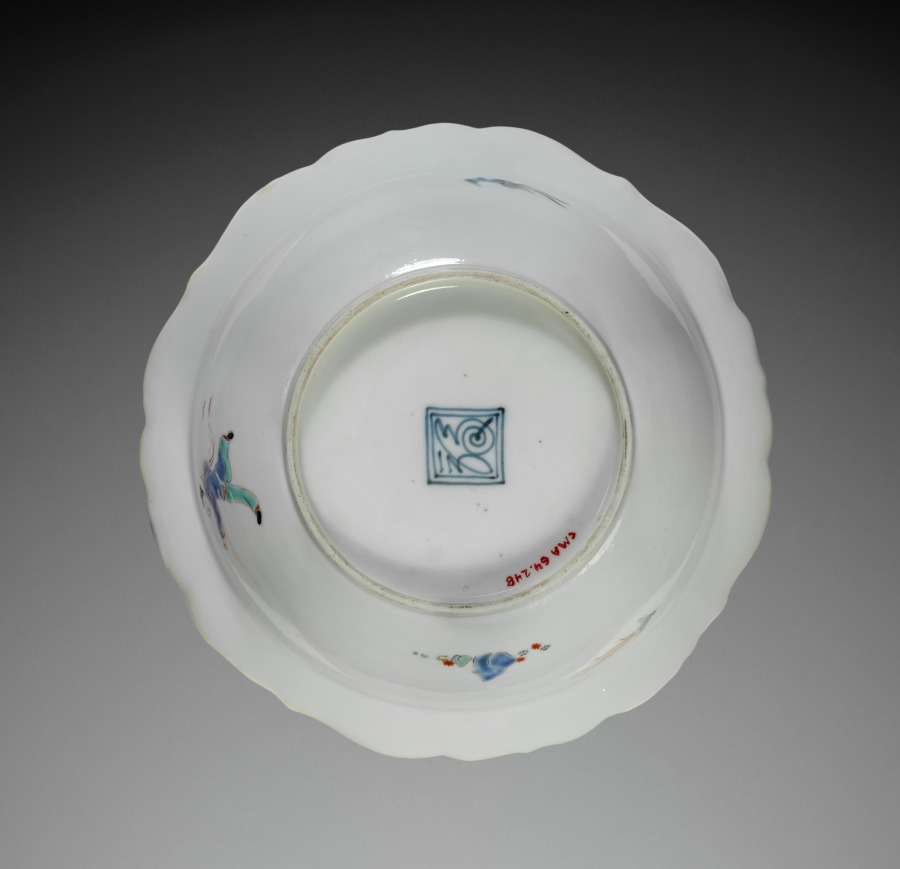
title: Deep Bowl with Dragons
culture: Japan, Edo period (1615–1868)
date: 1700s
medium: porcelain with overglaze color enamel and molding (Hizen ware, Kakiemon type)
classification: Ceramic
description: Graced with energetic dragons amid clouds, this deep bowl has a petal-shaped rim. The coiled position of the dragon in the center and the chasing action of those on the sides contribute to a sense of circular motion. The exterior shows a running figure and two birds in flight, echoing the movement in the interior.